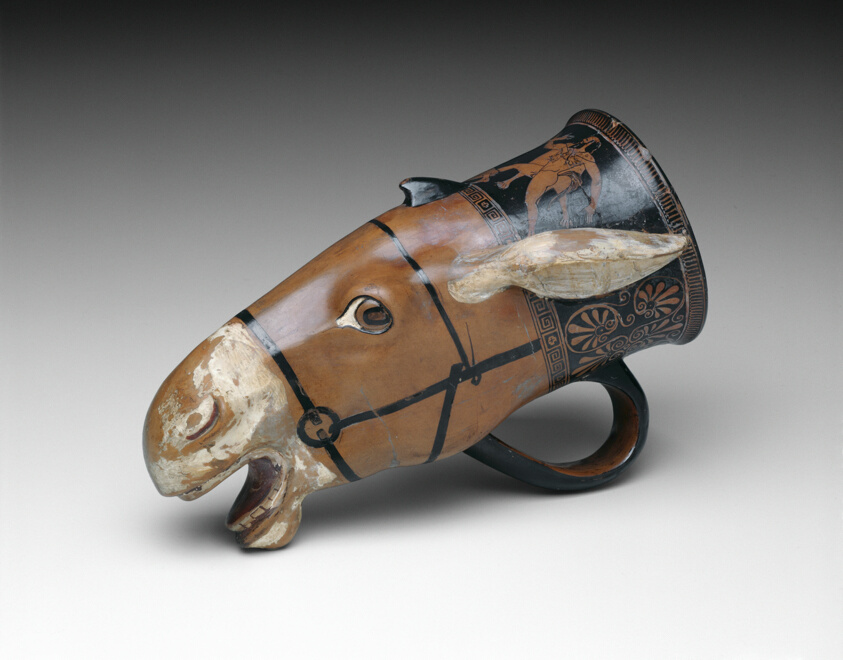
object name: Vessel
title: Rhyton (Drinking Vessel) in the Shape of a Donkey Head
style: high classical, Classical, attic, red-figure, ancient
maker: Attributed to the Painter of London E 55 (Manner of Douris); Greek; Athens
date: 480-470 BCE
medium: terracotta, red-figure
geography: Athens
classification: drinking vessel; earthenware; ceramics; vessel; ancient art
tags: donkeys, animals, drinking